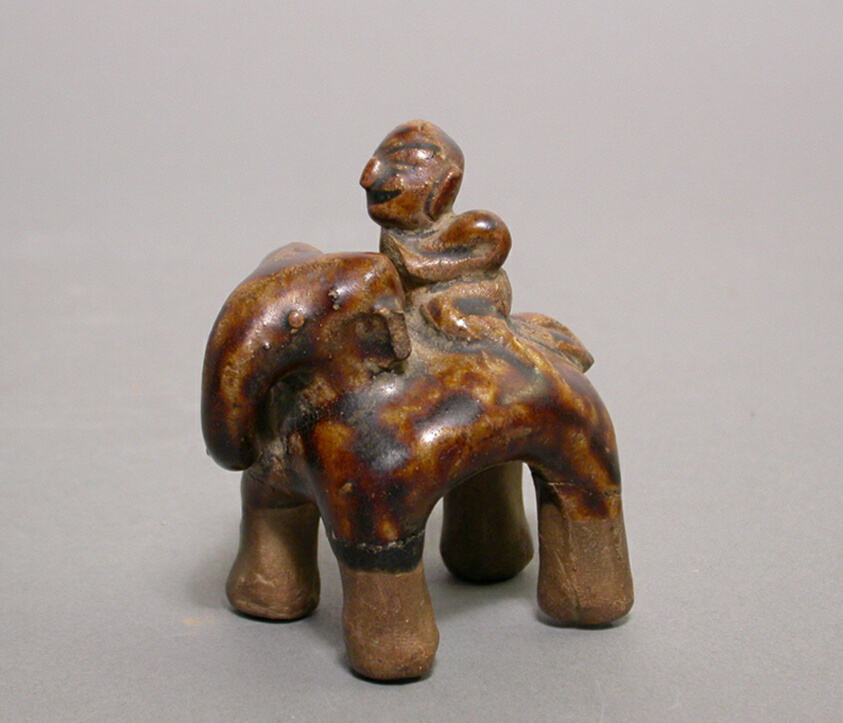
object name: Sculpture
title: Figurine of Elephant and Rider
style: Southeast Asian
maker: Thailand; Si Satchanalai (ancient kilns of Sawankhalok)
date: 14th/15th century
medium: Stoneware with brown glaze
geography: Thailand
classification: ceramics; sculpture; asian art